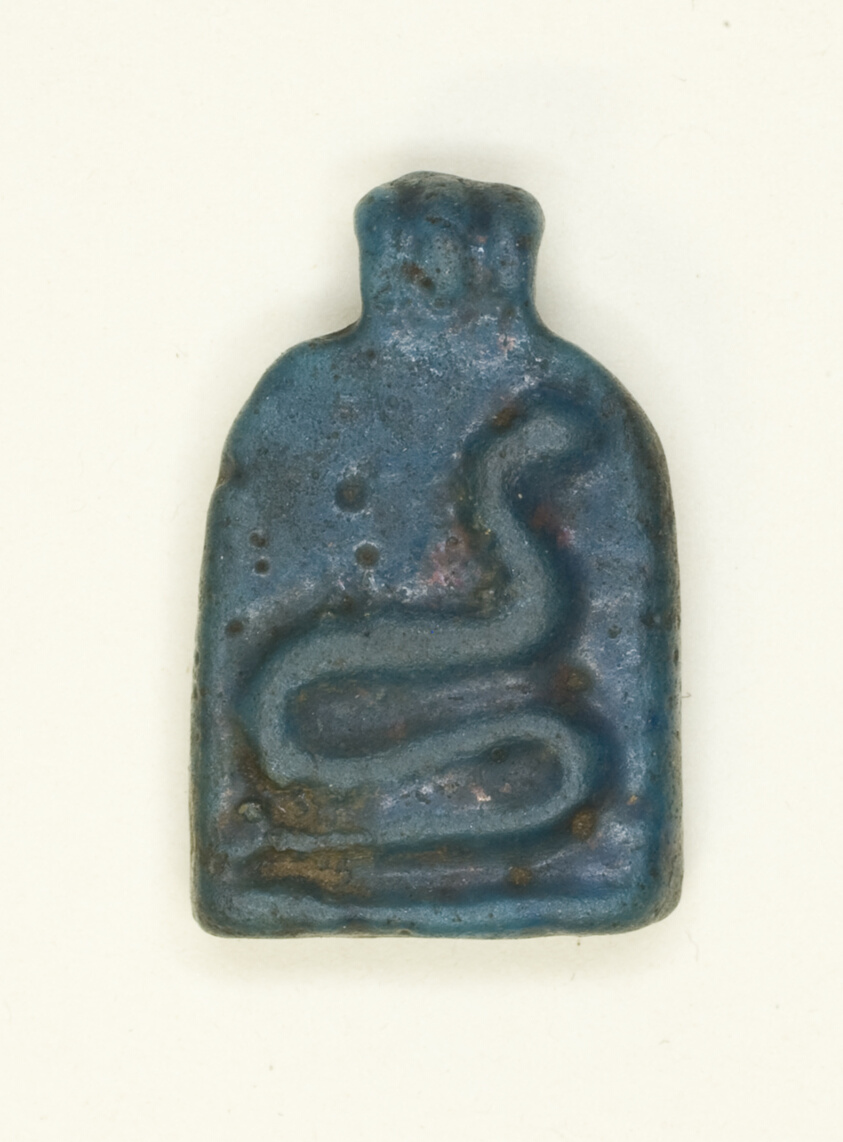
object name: Costume and Accessories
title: Amulet of a Serpent on a Stela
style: egyptian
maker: Egyptian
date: Third Intermediate Period (about 1070–664 BCE)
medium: Faience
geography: Egypt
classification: amulet; jewelry; ceramics; ancient art; costume; faïence (composite material)